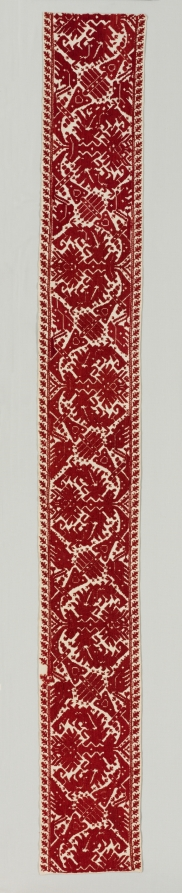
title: Border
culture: Greece, Ionian Islands, 16th-17th century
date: 1500s - 1600s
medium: embroidery: silk on linen tabby ground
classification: Embroidery